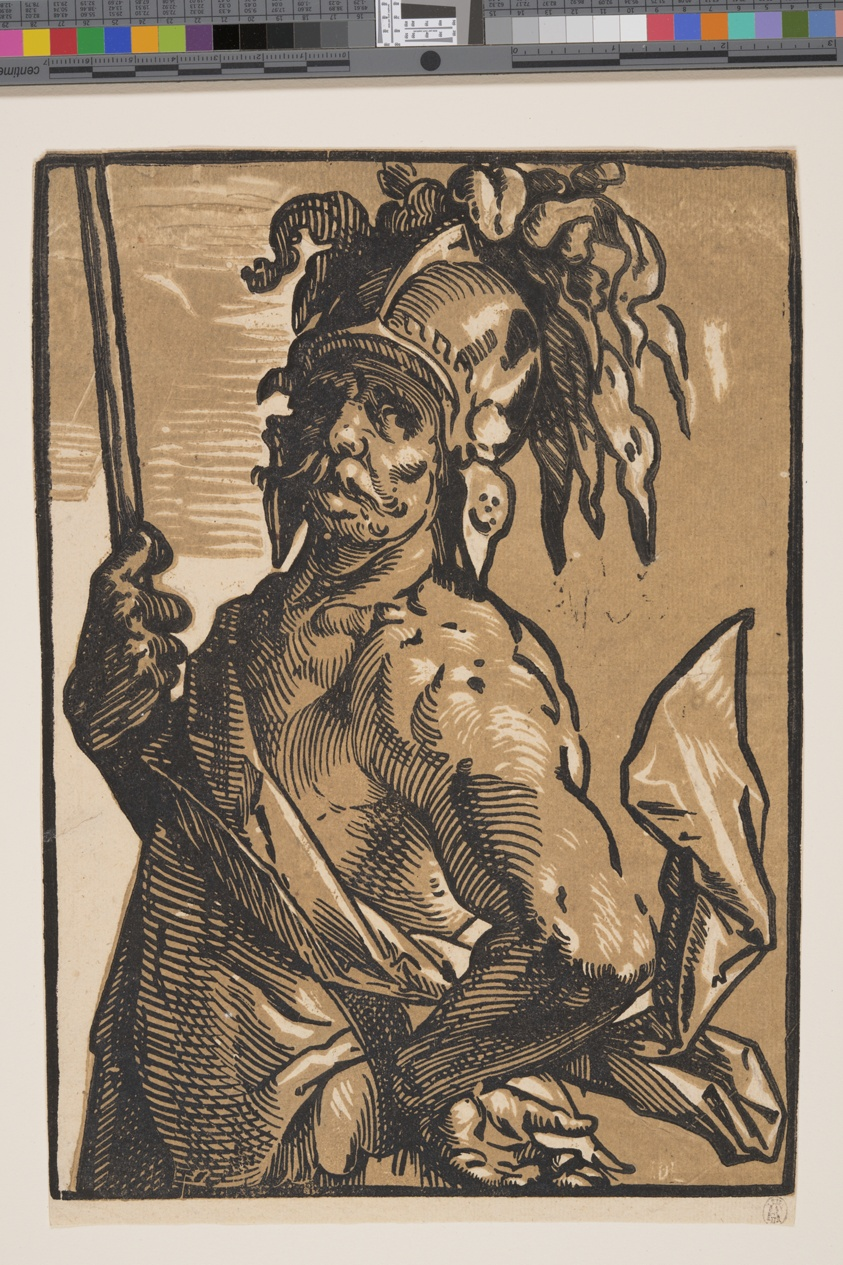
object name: Print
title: Mars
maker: Hendrick Goltzius (Dutch, 1558-1617)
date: c. 1588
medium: Chiaroscuro woodcut from two blocks in tan on ivory laid paper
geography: Netherlands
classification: print; paper; prints and drawing; woodcut